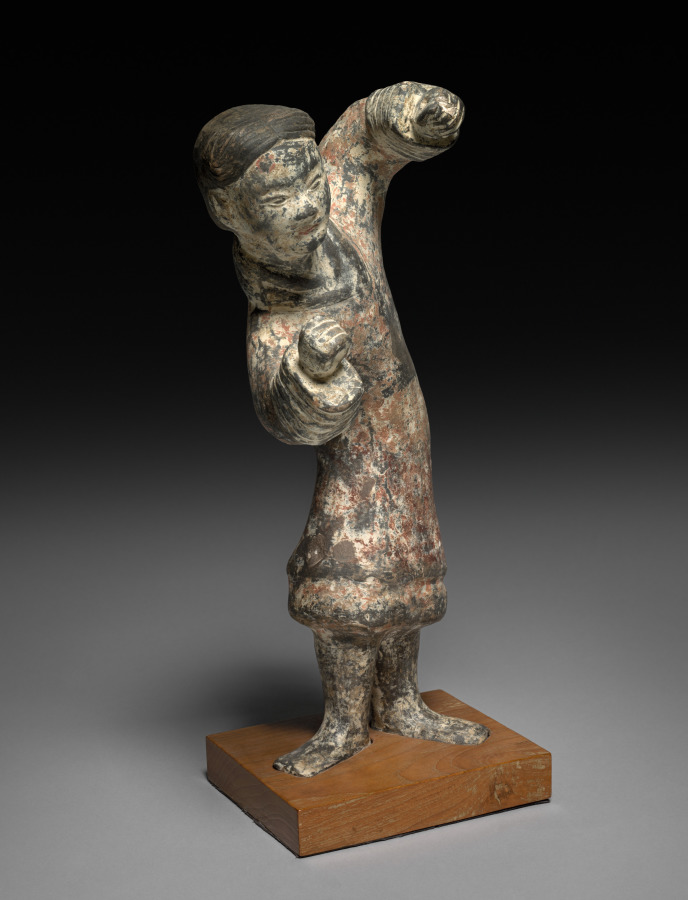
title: Dancing Figure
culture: China, style of Han dynasty (202 BCE–220 CE)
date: c. 1850–c. 1950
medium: painted plaster of Paris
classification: Sculpture